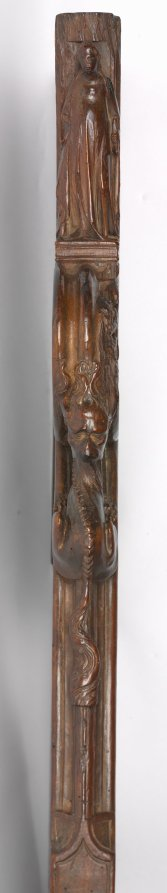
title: Panel from a Choir Stall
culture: Spain, Catalonia, Monastery of Pedralbes, 14th century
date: c. 1330–1340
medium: walnut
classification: Furniture and woodwork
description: The smaller panel here originated from an interior portion of a choir stall. The panel depicts a female figure in a long gown standing on a plinth above two of the apocalyptic beasts, the winged lion of Saint Mark and the winged ox of Saint Luke, which are supported by a wyvern (a heraldic winged dragon).